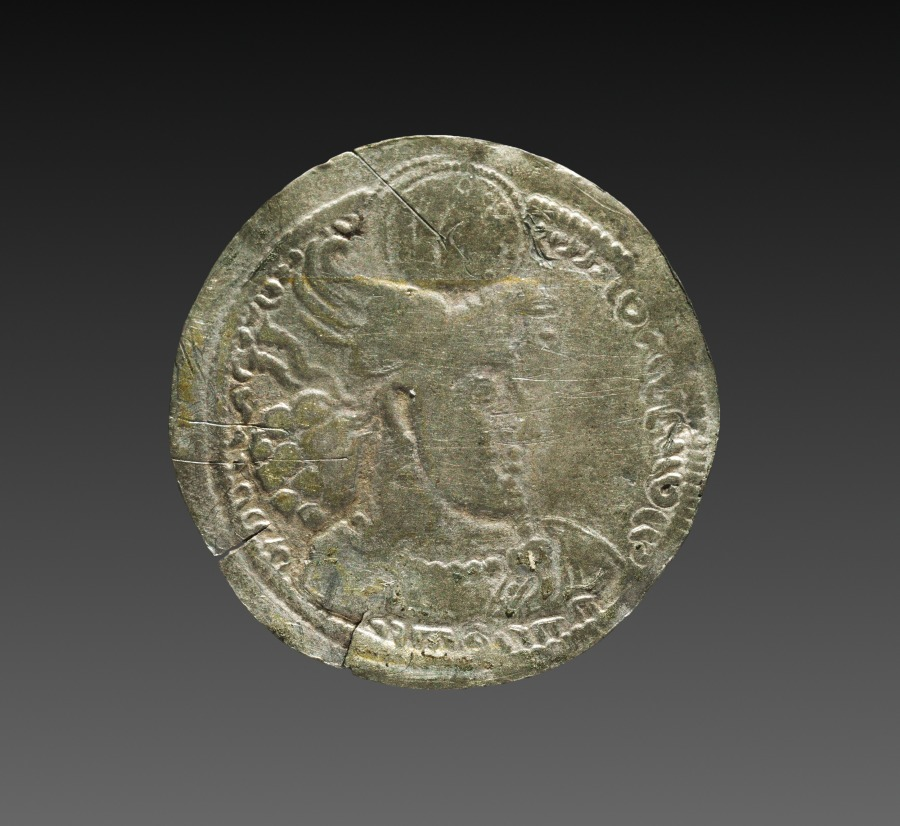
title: Drachm: Bust of Hormizd II (obverse); Fire altar with Bust (reverse)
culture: Iran, (minted), Sasanian Empire (224–651 CE), reign of Hormizd II (303–309)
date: 302–9 CE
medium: silver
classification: Coins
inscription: 𐭬𐭦𐭪𐭠𐭠𐭭𐭬𐭫𐭪𐭠𐭠𐭩𐭫𐭠𐭭𐭬𐭭𐭪𐭲𐭥𐭬𐭭𐭩𐭦𐭣𐭠𐭭 𐭬𐭦𐭣𐭩𐭮𐭭𐭡𐭢𐭡𐭥𐭧𐭬𐭦𐭣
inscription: 𐭠𐭲𐭥𐭫𐭦𐭩𐭠𐭥𐭧𐭬𐭦𐭣